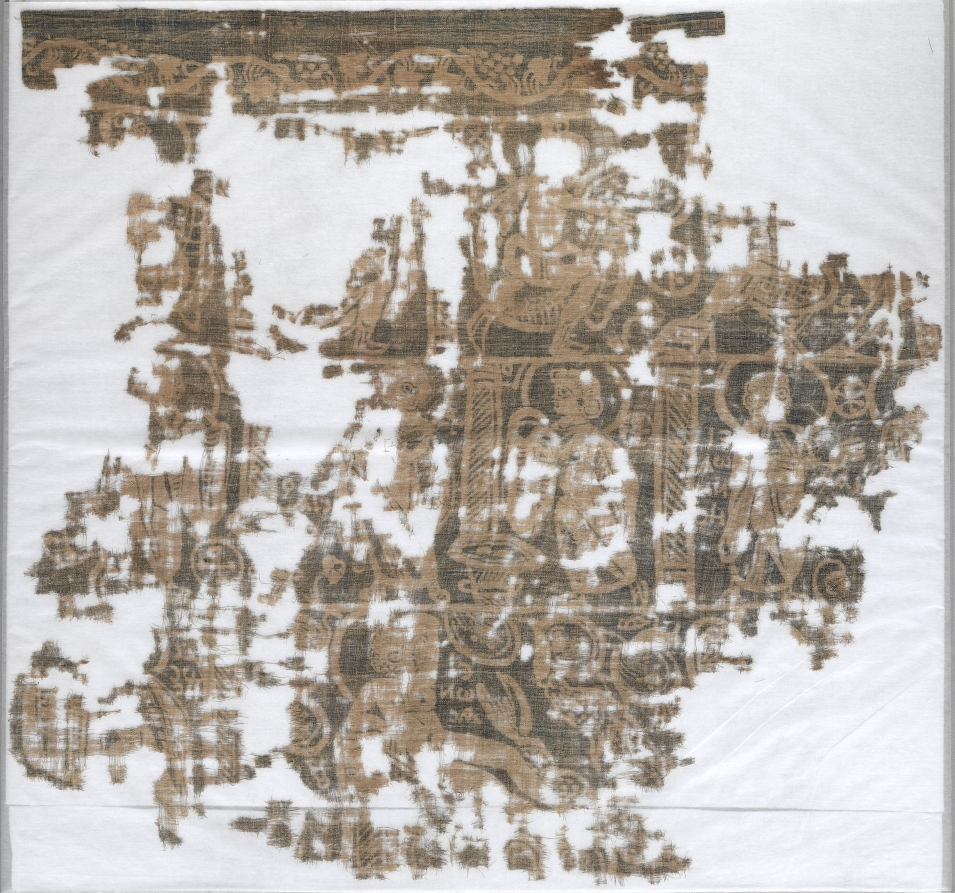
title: Resist-Dyed Hanging with Biblical Scenes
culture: Egypt, Byzantine period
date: 500–550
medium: linen: resist-dyed, plain weave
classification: Textile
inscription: Greek inscriptions identify the various scenes from the Old and New Testaments. Above the first of the Magi in the upper register can be seen the two letters "XP" from the Greek work for gold. At the left of the middle register are two figures, the first almost destroyed and the second identified by the inscription, "EIWANNHC," as John. In the lower register is a portrayal of Jonah thrown up on the shore with the big fish beside him and accompanied by the inscription, "EIWNAC." Moses, almost completely destroyed, is only identifiable by his inscription, "MWCHC."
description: This hanging textile features biblical scenes that early Christian people would have recognized. At left, the upper register shows the Virgin Mary and Christ child on a cross-legged stool. As a Coptic inscription indicates, the three kings approach from the right, carrying gifts. The middle register on the left may depict the baptism of Christ while the other three figures separated by columns appear to illustrate a New Testament miracle in which Christ feeds a large crowd with only five loaves of bread and two fish. In the lower register, the Old Testament scene of the prophet Jonah being swallowed by a whale is still recognizable.